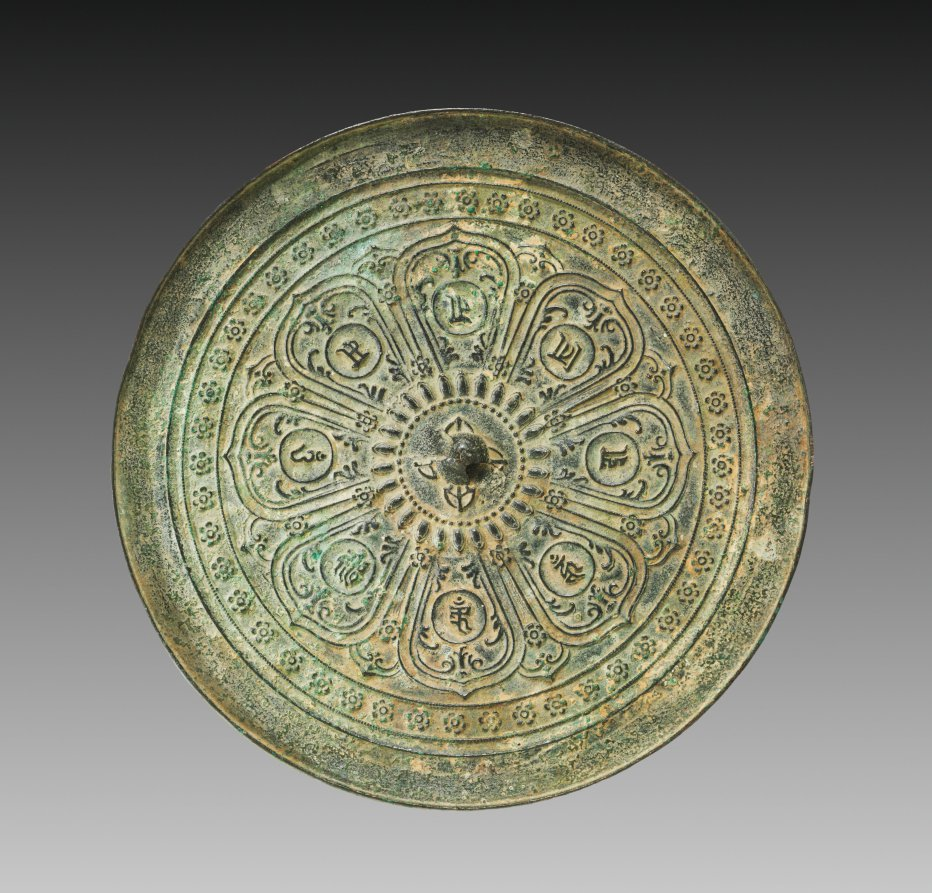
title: Mirror with Lotus and Mantra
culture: China, Yuan dynasty (1271-1368)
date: 1271–1368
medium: bronze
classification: Metalwork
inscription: "In the name of Om mani padme hum."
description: This mirror features intricate Buddhist designs. Around the central knob are four leaves, a ring of tiny beads, and then a circle made up of small lotus flower designs. Outside of that are eight big petal shapes, inside each is a Sanskrit letter. The mirror has the phrase "In the name of Om mani padme hum" written in a slightly incorrect form of Sanskrit, possibly because the Chinese mirror maker was not familiar with the language.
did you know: A mantra, or meditative statement, is embedded in the petals of the lotus flower on the mirror's back.